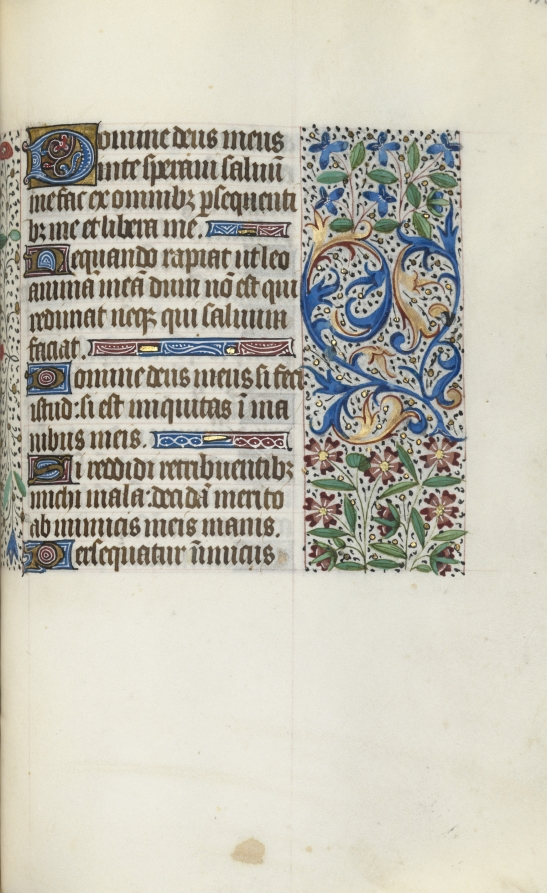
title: Book of Hours (Use of Rouen): fol. 113r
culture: France, Rouen, 15th century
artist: Master of the Geneva Latini (French, active Rouen, 1460–80)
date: c. 1470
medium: ink, tempera, and gold on vellum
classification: Bound Volume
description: In the late 1400s and early 1500s Rouen was an established and important center of book production. The city’s cathedral had a wealthy chapter that spent large sums of money to commission books and to maintain its extensive library. The stationers and booksellers would have likely been concentrated in or near the cathedral precinct. This artist, named after a manuscript now in Geneva, was Rouen’s principal illuminator during the second half of the 1400s.